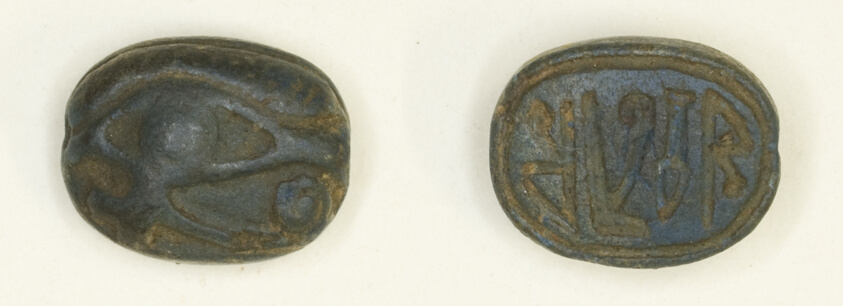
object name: Costume and Accessories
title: Scaraboid: Wedjat Eye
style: new kingdom, egyptian, ancient, eighteenth dynasty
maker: Egyptian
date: New Kingdom, Dynasty 18 (about 1550–1295 BCE)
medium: Glazed steatite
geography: Egypt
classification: scaraboids; ancient art; costume; amulet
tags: eye of Horus, crowns, eyes, Hieroglyphs